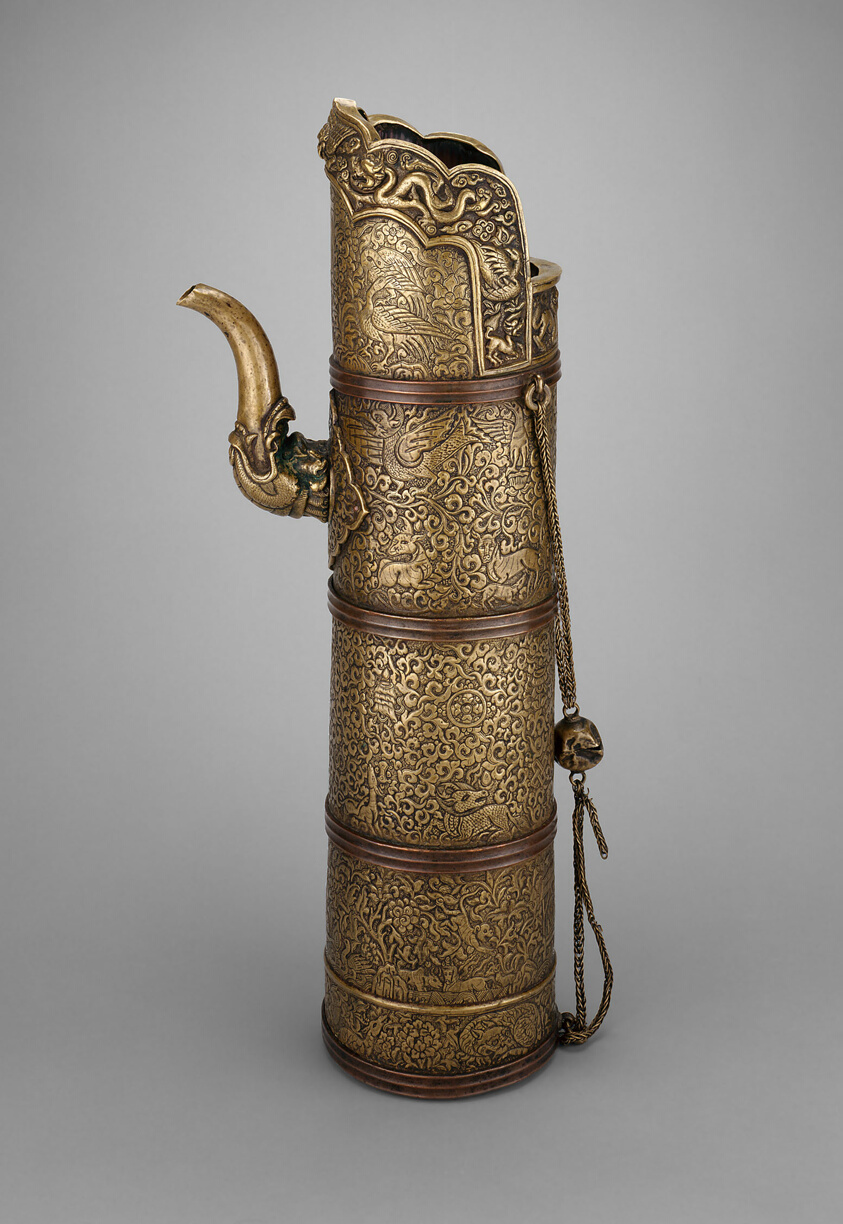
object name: Decorative Arts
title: Ewer with Crocodile (Makara) Spout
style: Himalayan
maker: Eastern Tibet; Kham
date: 16th century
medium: Brass with copper bands over bamboo core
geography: Tibet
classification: ewer (vessel); vessel; asian art; decorative arts